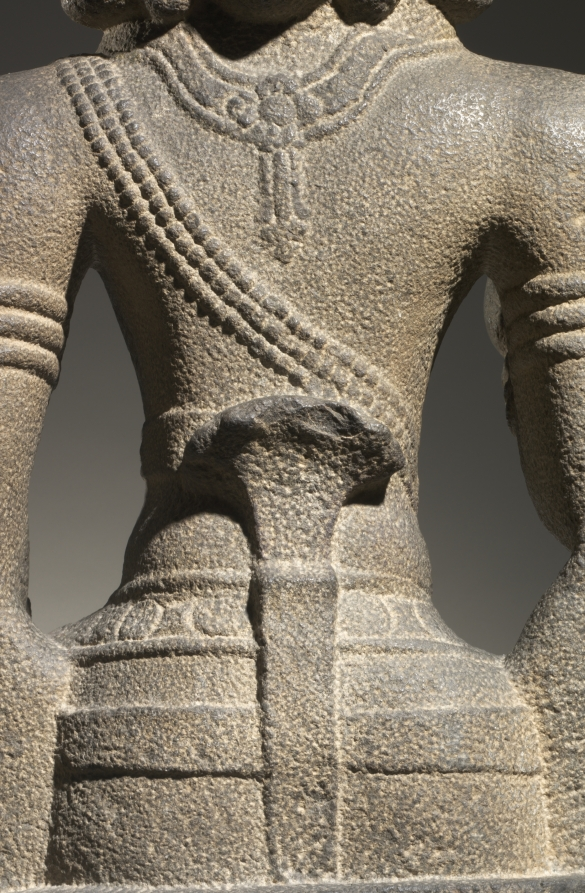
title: Brahma-Shiva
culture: South India, Tamil Nadu, Chola dynasty, late 10th - early 11th century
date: late 900s–1000s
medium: granite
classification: Sculpture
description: In the Hindu pantheon Brahma is in charge of carrying out the work of creation. In this tour-de-force of South Indian temple sculpture, he is in a special regal aspect, with the only elements of his typical priestly appearance being the prayer beads and the matted dreadlocks piled on his head. Four arms connote superhuman power, and four heads convey the idea that his creative activities spread in all four directions. His upper right hand enjoins freedom from fear, and the lower holds a lotus bud associated with birth and the process of creation. His lowered left hand is held in the gift-giving gesture, suggestive of the gift of creation he will bestow upon the world.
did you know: The back of the sculpture retains the original textured surface from a pointed chisel, suggesting it was in a niche or near a wall, protected from worshippers’ touches.